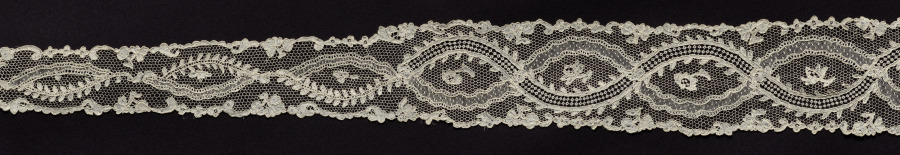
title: Lace Lappet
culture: France, Argentan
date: 1715–74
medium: Linen: needle lace (Point de Argentan)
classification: Lace